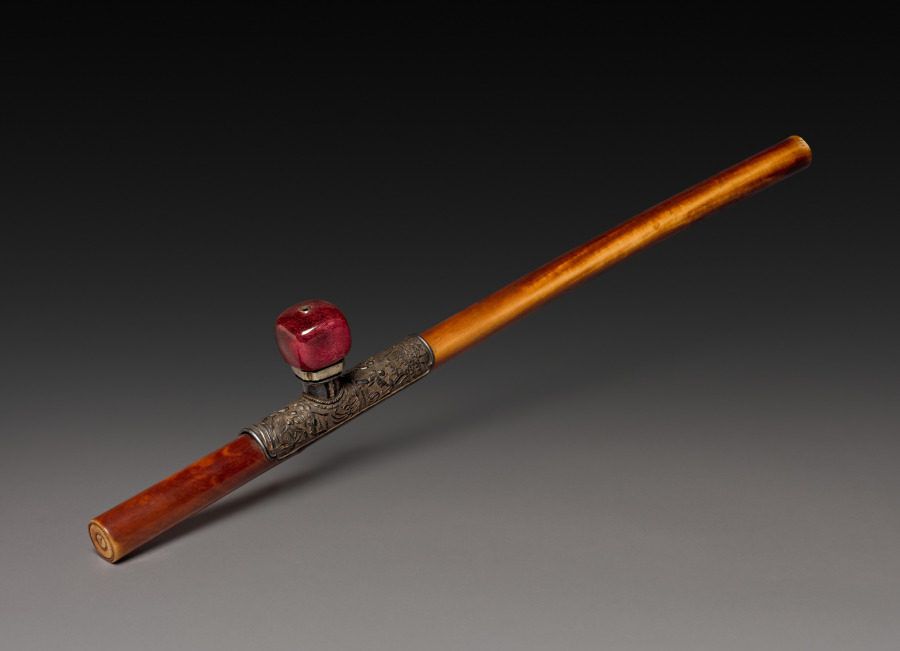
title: Opium Pipe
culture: China, Qing dynasty (1644-1911)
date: 1800s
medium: ivory with silver repoussé decoration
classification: Miscellaneous